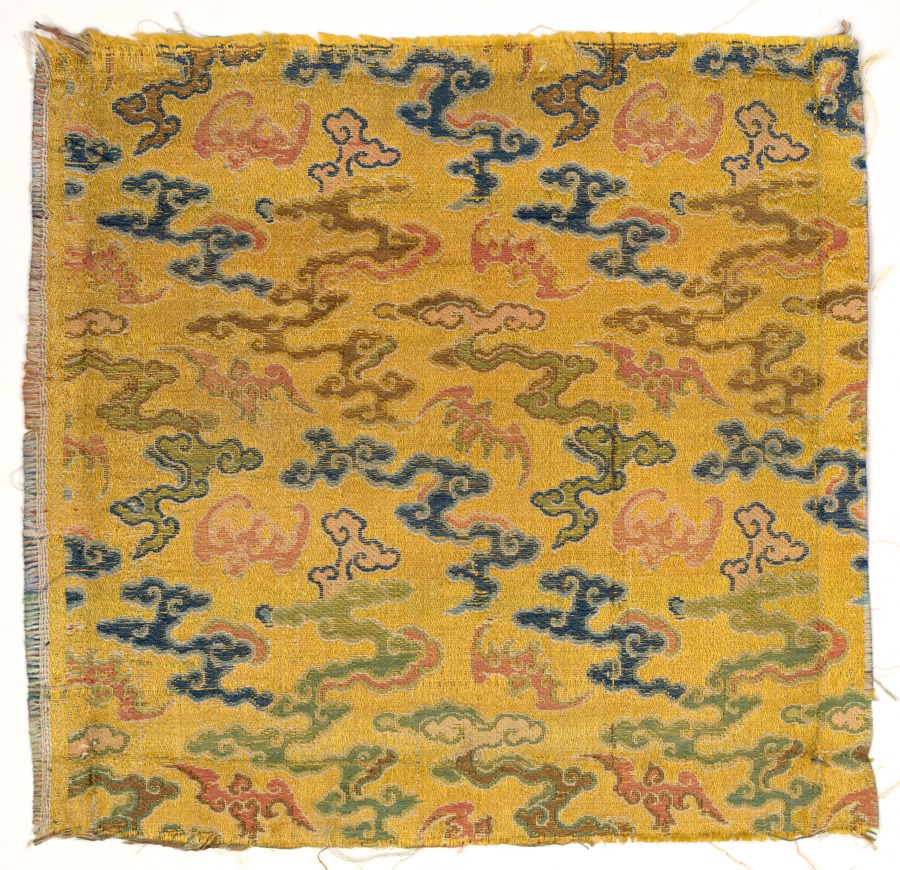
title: Fragment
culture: China, Qing dynasty (1644-1911)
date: 1700–20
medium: satin ground; silk diasper weave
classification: Textile